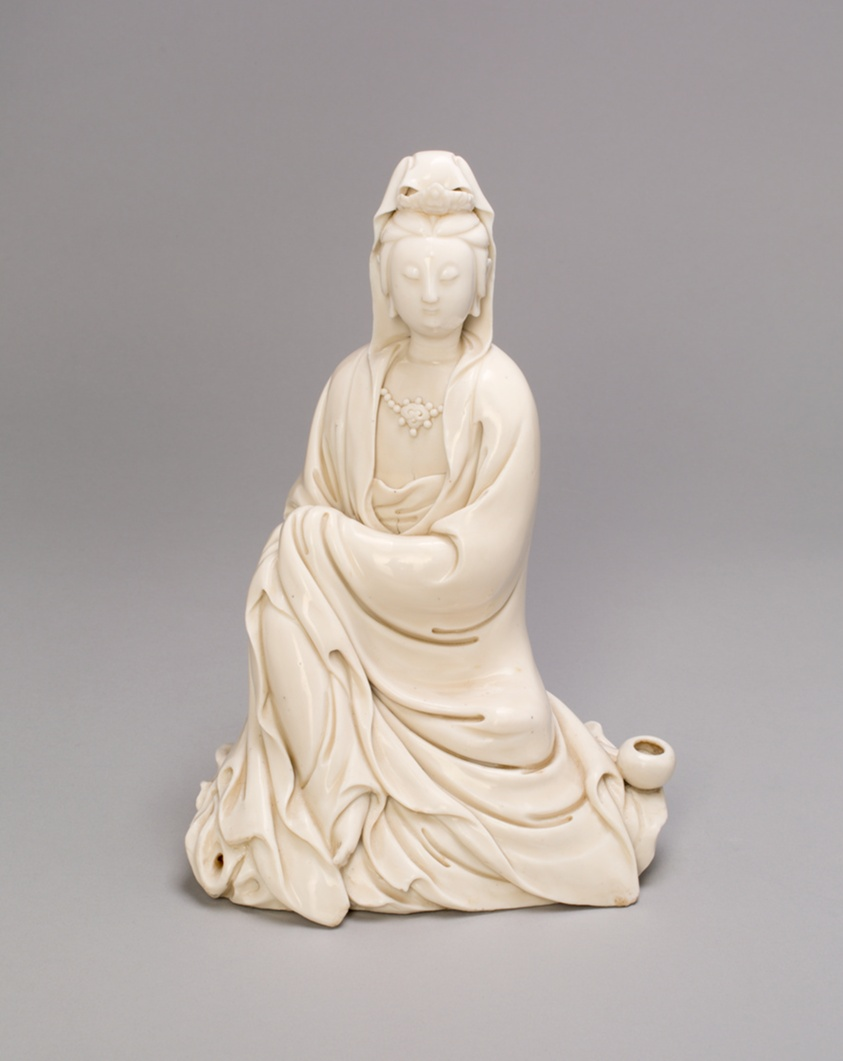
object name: Sculpture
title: Seated Guanyin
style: Chinese (culture or style)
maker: China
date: Qing dynasty (1644–1911), late 17th/18th century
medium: Dehua ware (blanc de chine); porcelain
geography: China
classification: porcelain; asian art; ceramics; sculpture